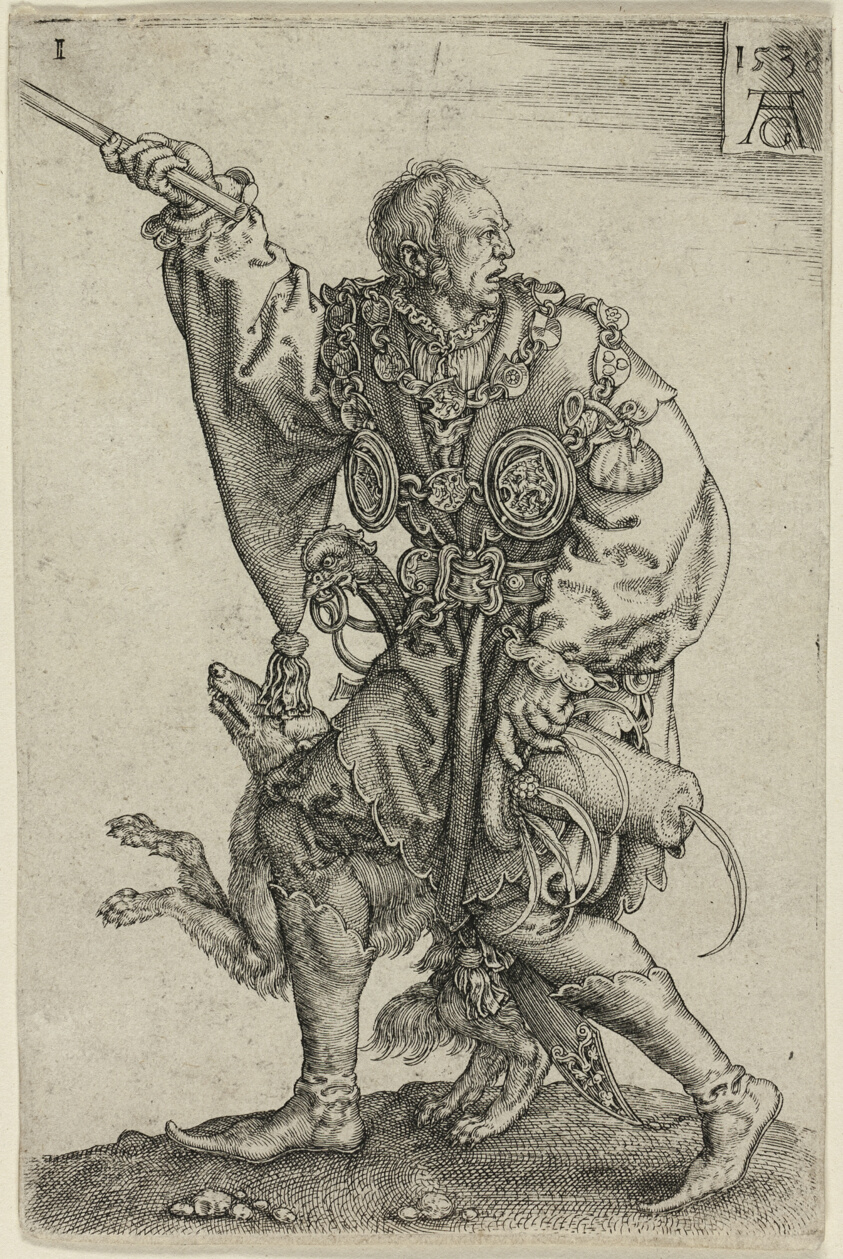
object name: Print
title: Master of Ceremonies with a Dog, plate one from the Large Wedding-Dancers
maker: Heinrich Aldegrever (German, 1502-c.1560)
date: 1538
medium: Engraving in black on ivory laid paper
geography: Germany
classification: engraving; print; prints and drawing